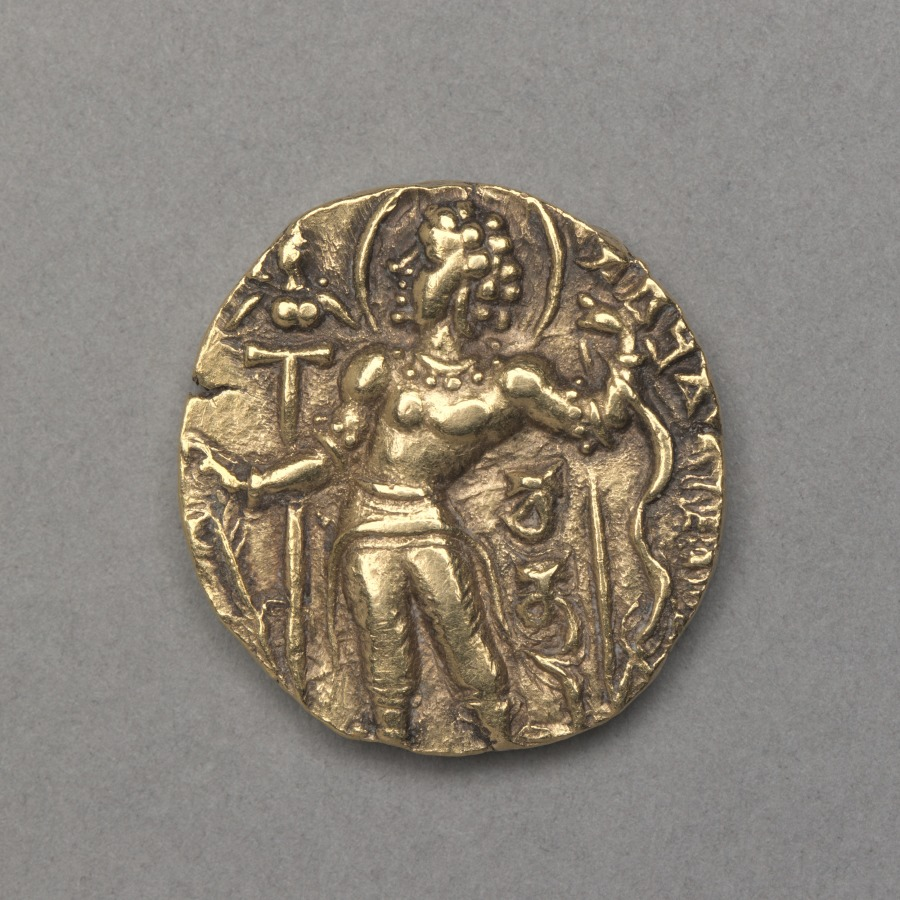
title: Coin of Chandragupta II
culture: India, Chandragupta II, Gupta Period, late 4th-early 5th century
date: c. 400 CE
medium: gold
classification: Coins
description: The rulers of the Gupta dynasty unified northern India under native rule for the first time since the Maurya empire (323-185 bc). The Guptas named themselves after Chandragupta, the founder of the Maurya dynasty. This coin of Chandragupta II, who ruled from around ad 380 to 415, depicts a divine archer holding a bow and arrow. On the reverse is the Indian goddess of good fortune, Shri, seated on a lotus.